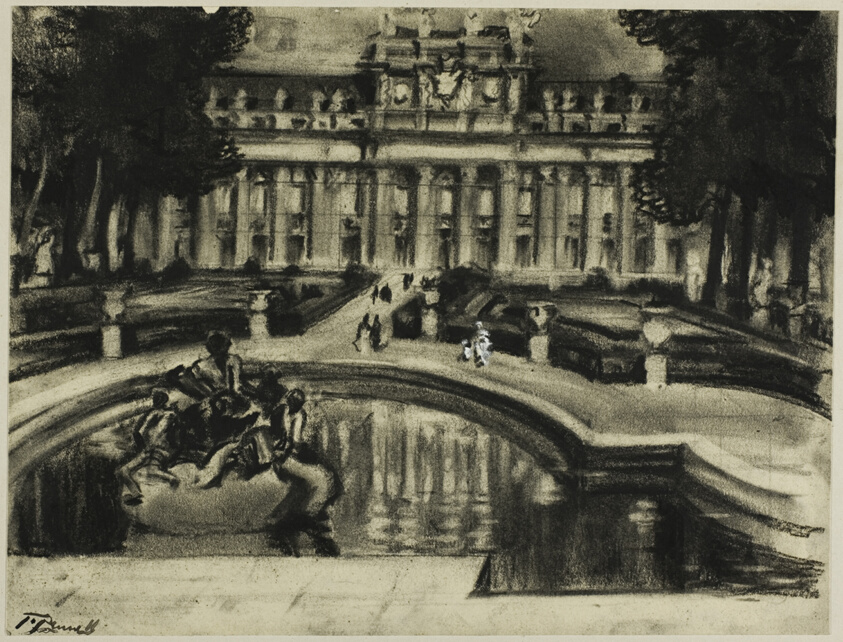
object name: Drawing and Watercolor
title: Palace La Granga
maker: Joseph Pennell (American, 1857-1926)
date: c. 1903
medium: Oiled charcoal with stumping, with touches of white chalk, on cream wove paper, perimeter mounted on off-white wood-pulp laminate board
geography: United States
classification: charcoal; drawings (visual works); prints and drawing